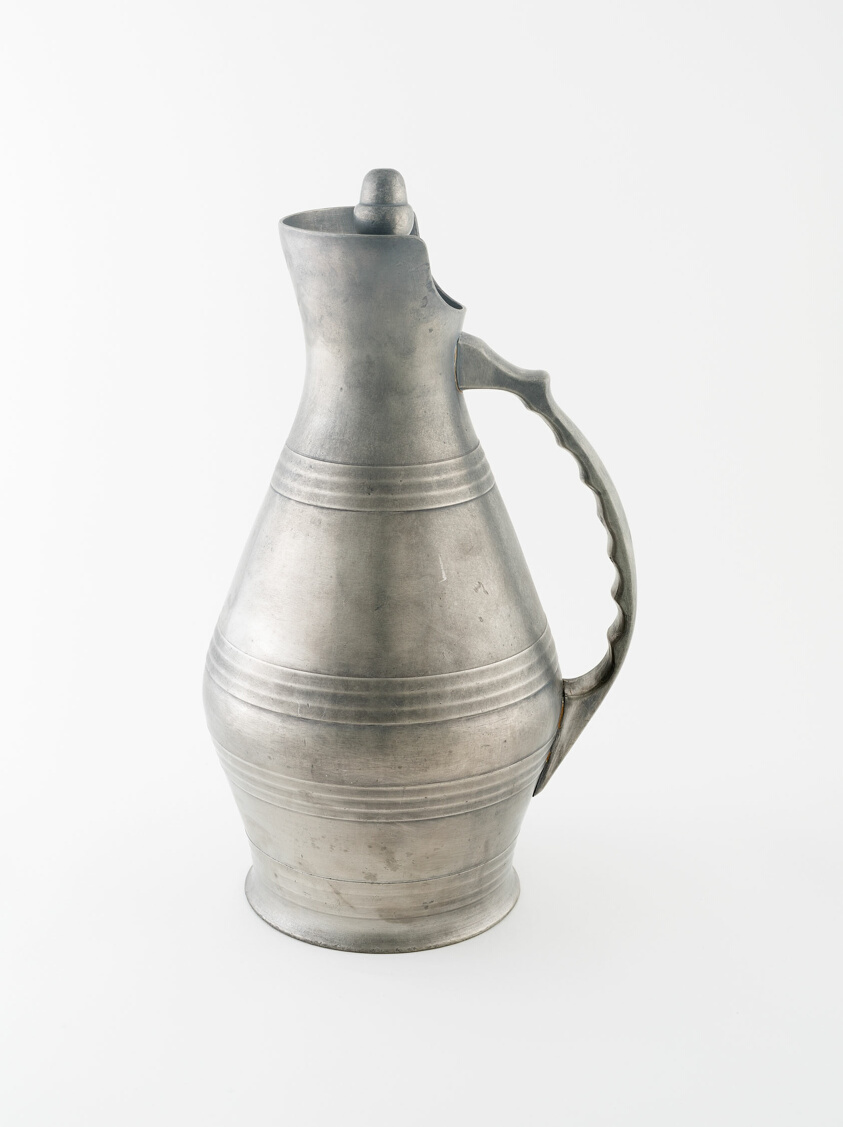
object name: Metalwork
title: Cider Jug with Lid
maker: Paris, France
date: 19th century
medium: Pewter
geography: Paris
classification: pewter; metalwork; european decorative arts